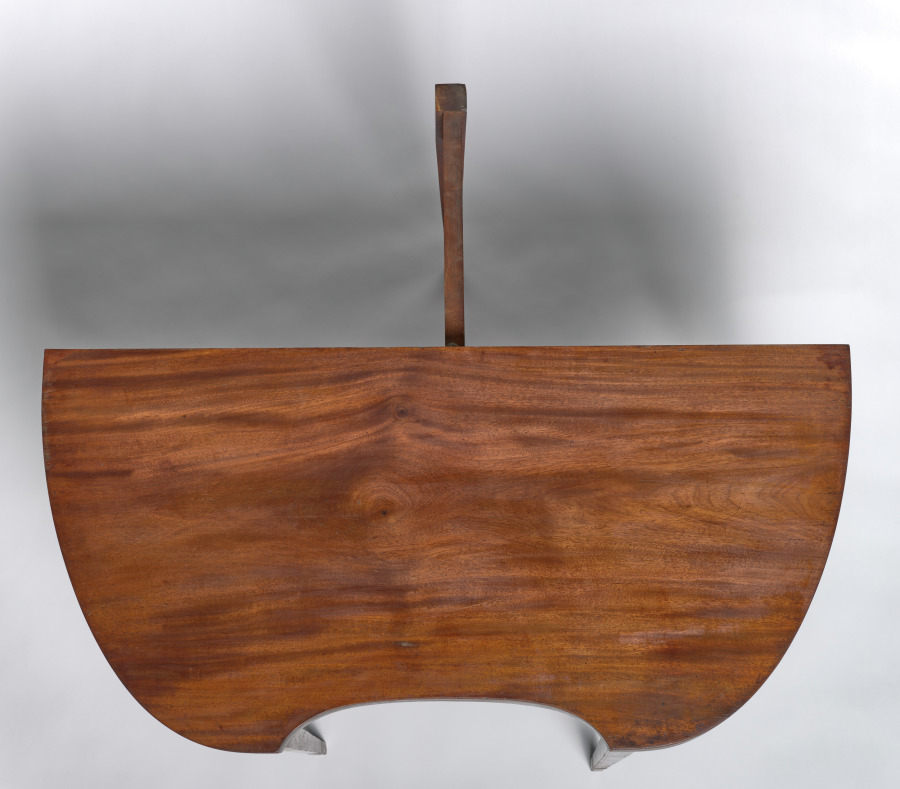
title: Game Table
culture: America, Maryland, Baltimore, early 19th Century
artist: style of George Hepplewhite (American, 1786)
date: c. 1800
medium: mahogany with inlays of various woods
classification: Furniture and woodwork